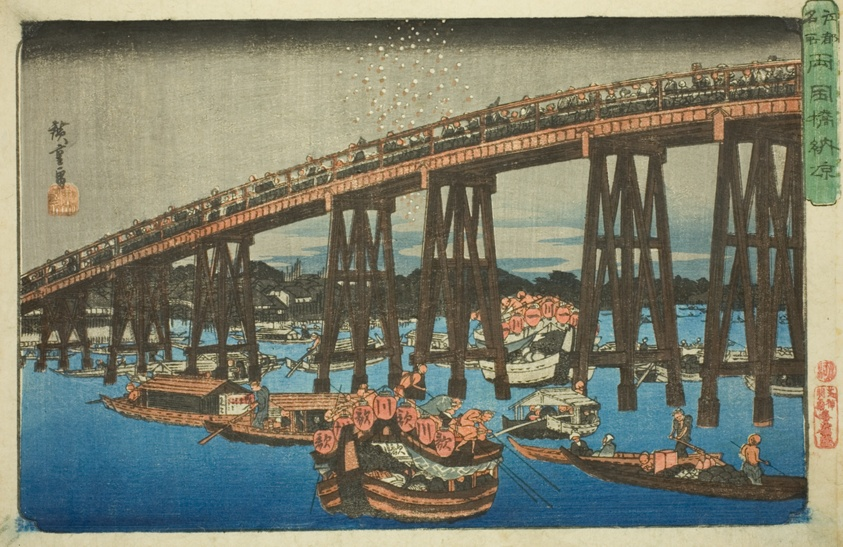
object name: Print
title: Cooling off at Ryogoku Bridge (Ryogokubashi noryo), from the series "Famous Places in Edo (Koto meisho)"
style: Japanese (culture or style)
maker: Utagawa Hiroshige 歌川 広重; Japanese, 1797-1858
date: c. 1839/42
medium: Color woodblock print; oban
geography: Japan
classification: woodblock print; print; asian art